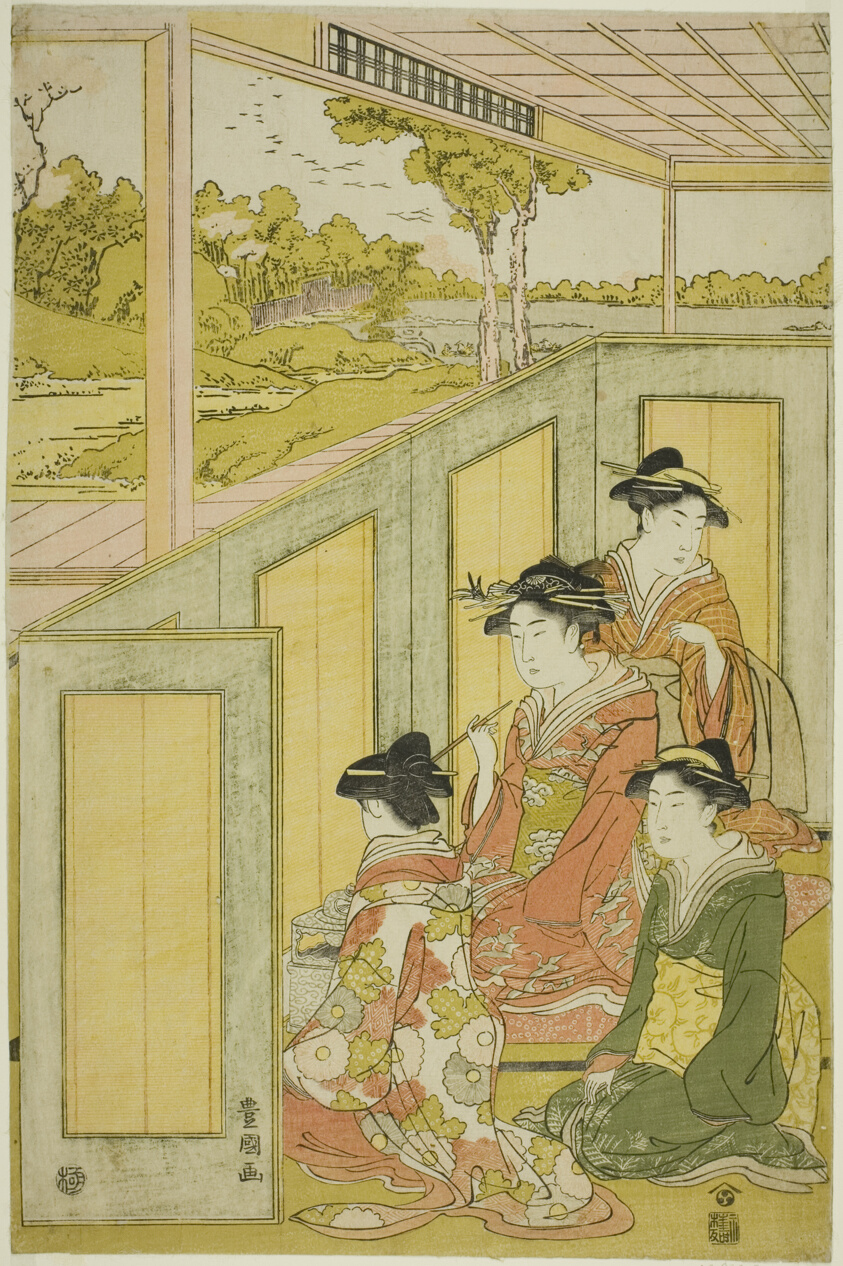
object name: Print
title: Ladies behind screen in a daimyo's mansion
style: Japanese (culture or style)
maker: Utagawa Toyokuni I 初代 歌川 豊国; Japanese, 1769–1825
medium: Color woodblock print; sheet from oban pentaptych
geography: Japan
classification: woodblock print; print; asian art